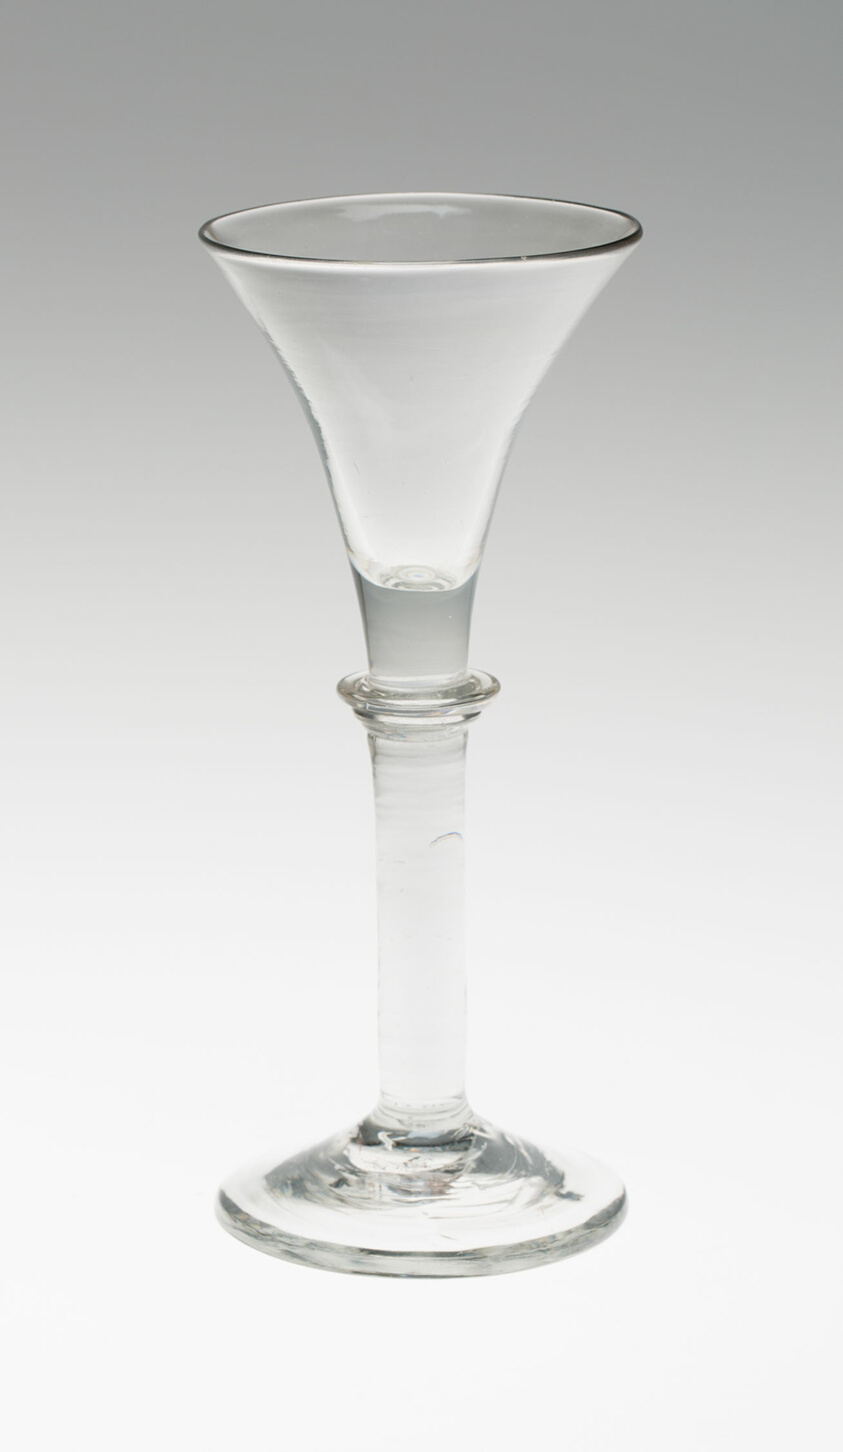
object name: Glass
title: Wine Glass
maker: England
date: c. 1750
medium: Glass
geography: England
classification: drinking vessel; glass